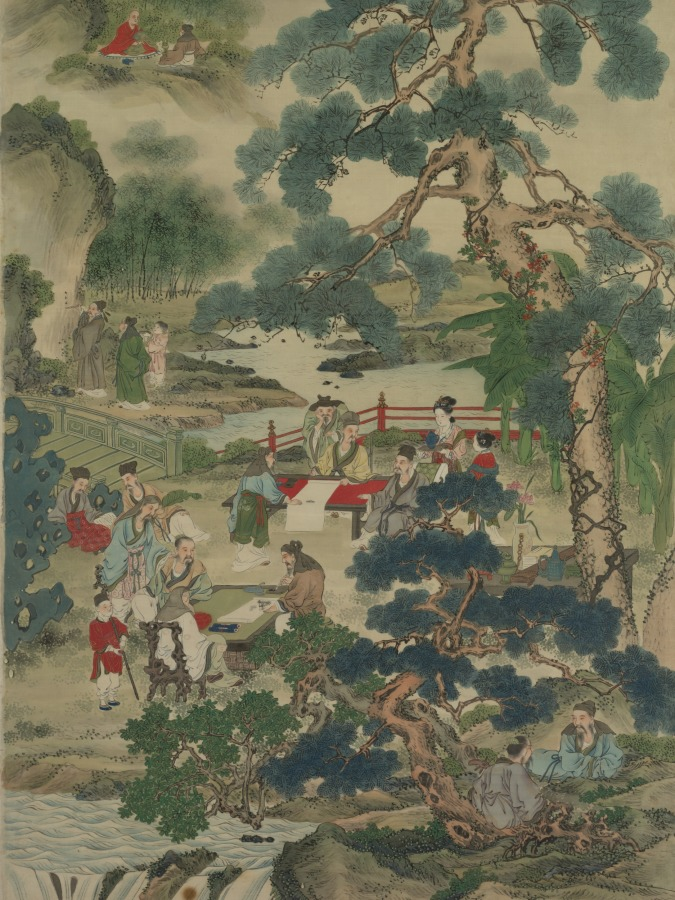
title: Chinese Sages in a Garden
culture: Japan, Meiji period (1868–1912)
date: 1888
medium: ink and color on silk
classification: Painting